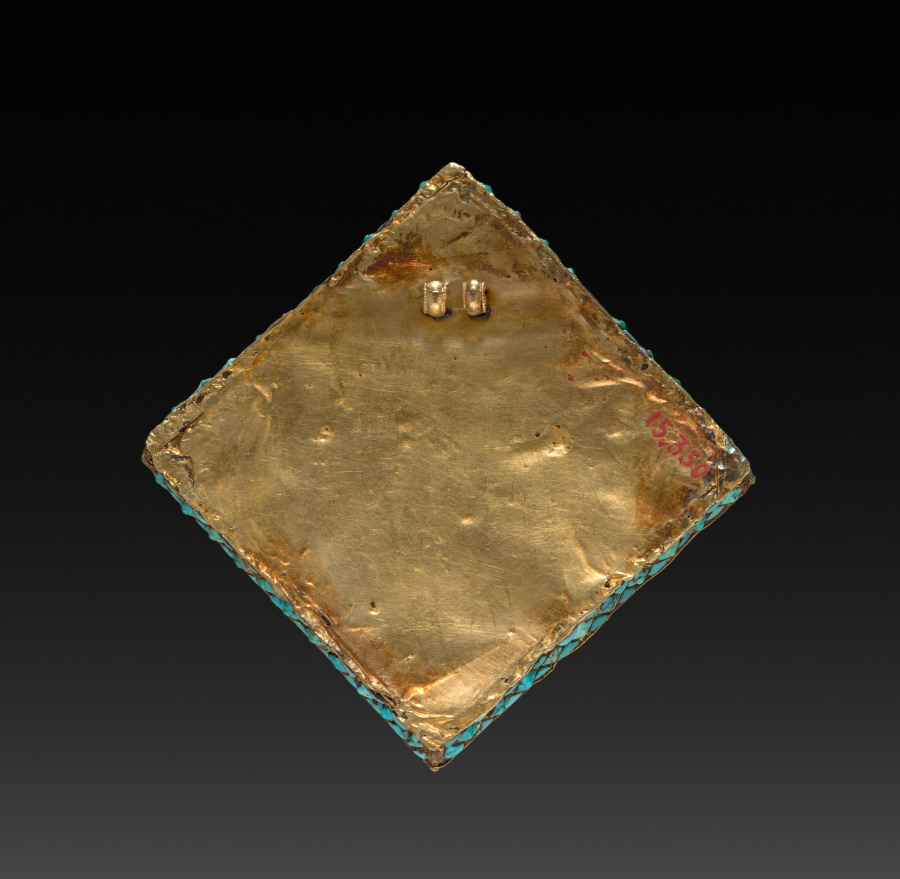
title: Charm Case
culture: Tibet, 19th century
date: 1800s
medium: gold with jewels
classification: Jewelry